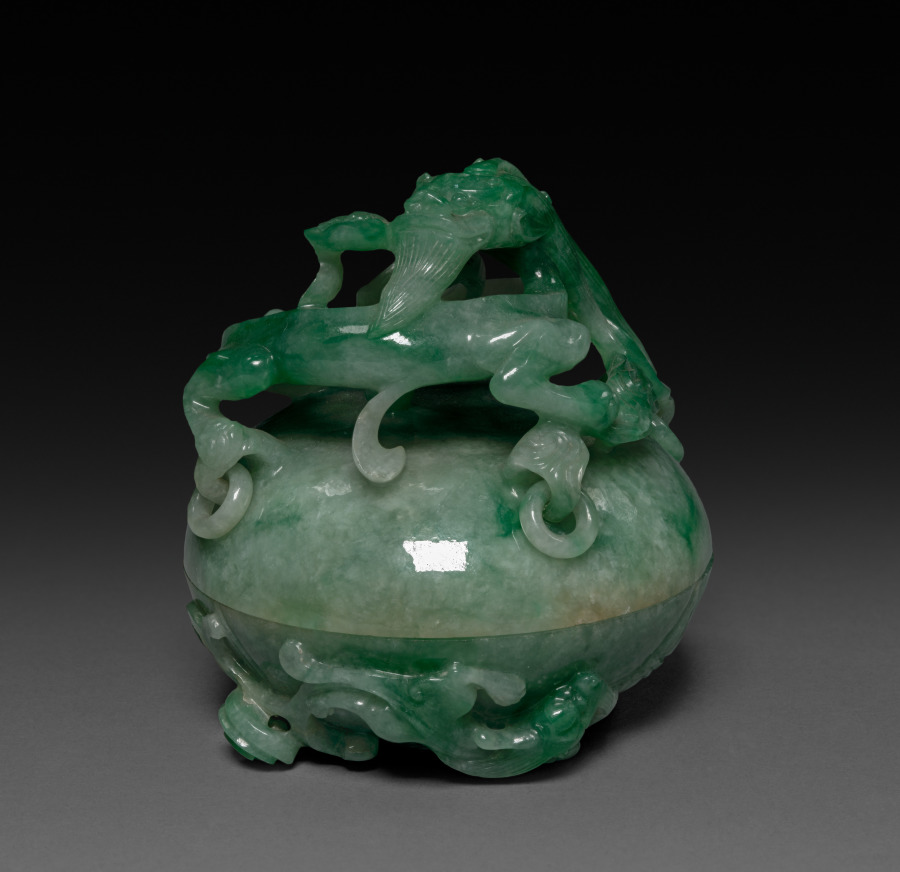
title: Three-Sectional Altar Group: Small Bowl with Carved Dragon with Lid and Base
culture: China, Qing dynasty (1644-1911)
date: 1644–1911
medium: jade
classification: Jade